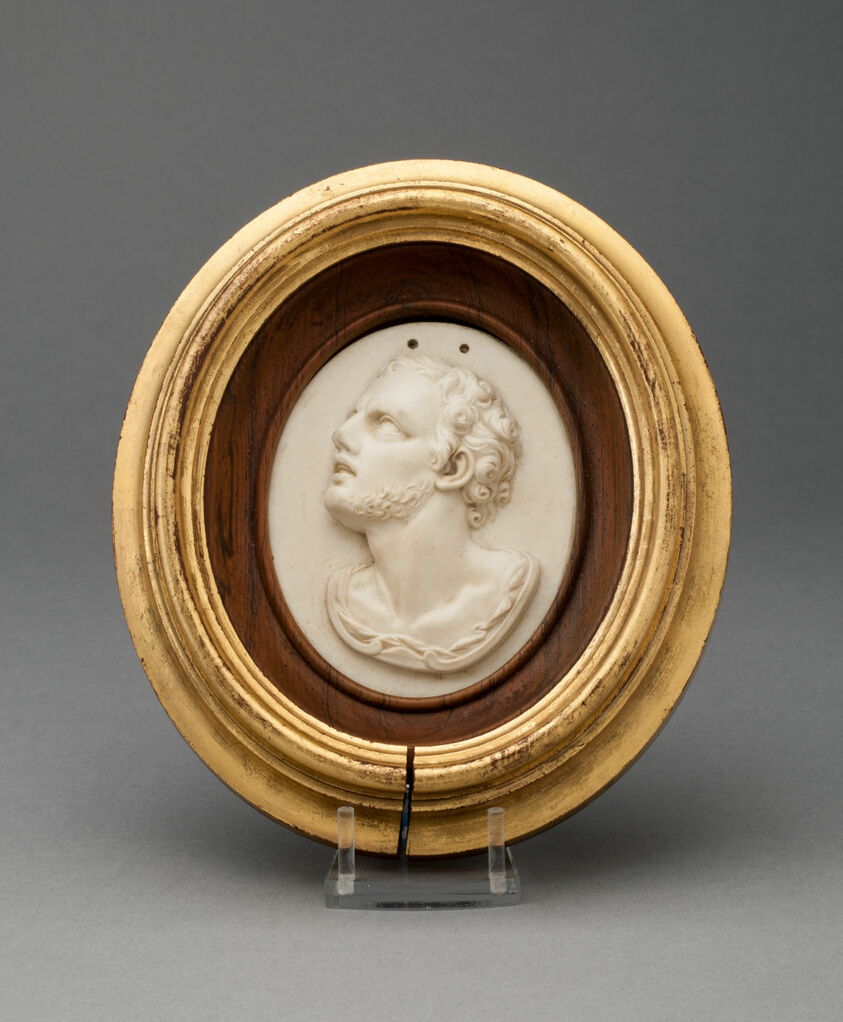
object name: Ceramics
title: Plaque with Marcus Antonius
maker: Wedgwood Manufactory (England, founded 1759)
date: 1776/80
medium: Stoneware (jasperware)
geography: Burslem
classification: sculpture; stoneware; european decorative arts; ceramics